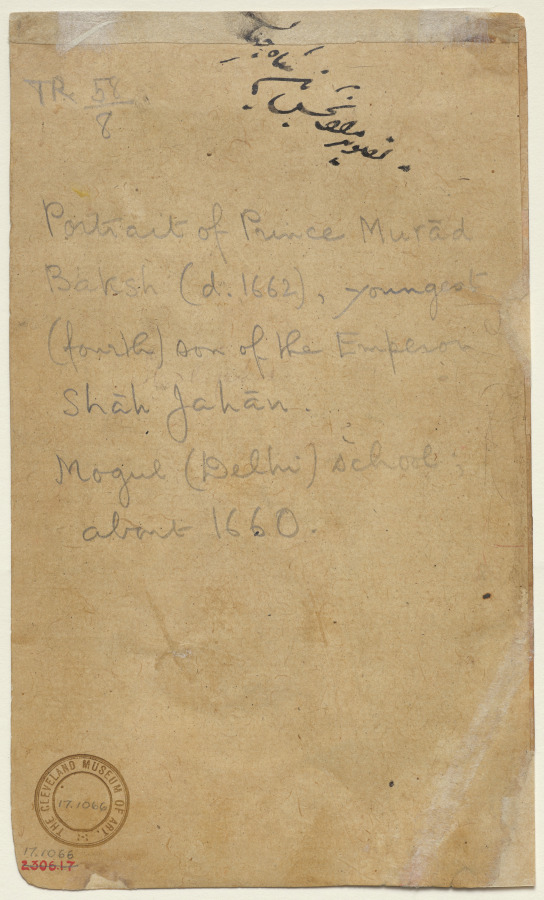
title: Portrait of Prince Murad Baksh (1624–1661)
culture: Mughal India, court of Shah Jahan (1627–58)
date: c. 1655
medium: Gum tempera and gold on paper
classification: Painting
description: This portrait depicts the Mughal prince Murad Baksh in his early 30s, at the height of his power and promise. He wears a golden coat of honor with fur collar and the swords and shield of a military officer. As the youngest son of Emperor Shah Jahan, he was intimately involved in the struggles for succession. In 1658, he sided with his brother Aurangzeb (1618–1707) against their eldest brother, the crown prince, whom they defeated in a decisive battle that led to the crown prince’s eventual assassination in 1659. Aurangzeb then turned on his youngest brother, Murad Baksh himself, and had him imprisoned and finally executed in 1661.